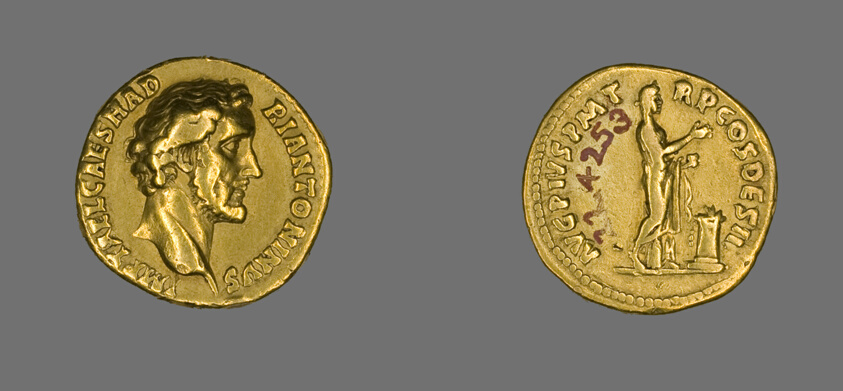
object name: Coin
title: Aureus (Coin) Portraying Emperor Antoninus Pius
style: imperial (roman), ancient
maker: Roman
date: 138-161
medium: Gold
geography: Roman Empire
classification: coin; ancient art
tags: portraits